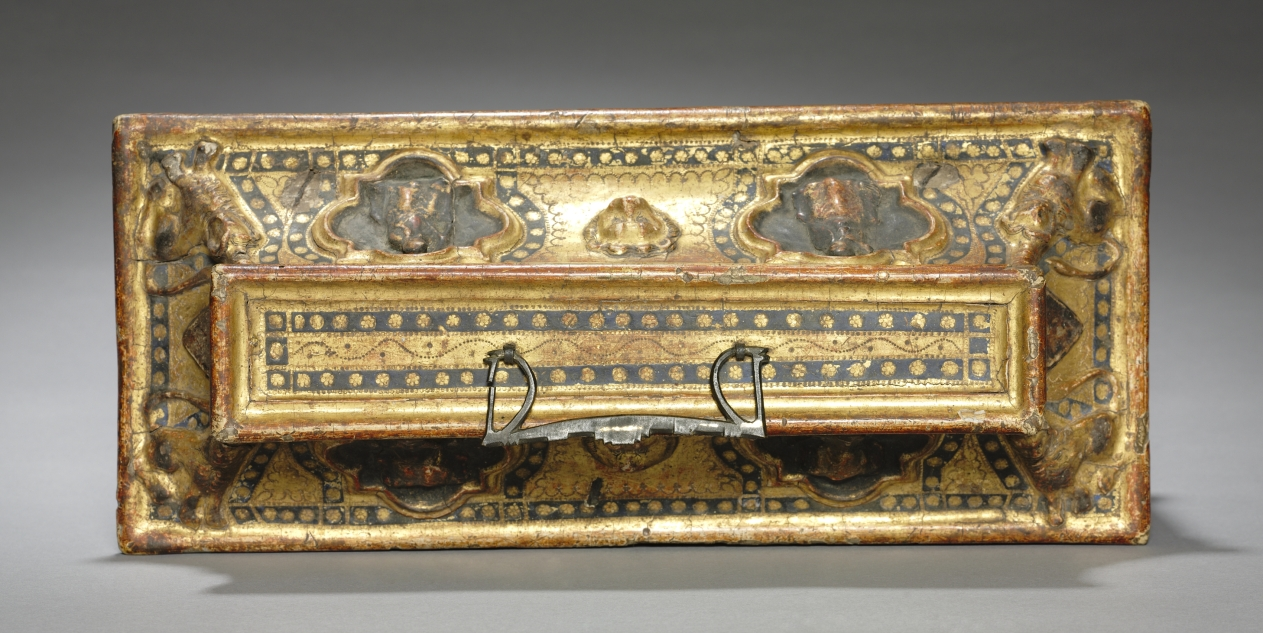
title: Casket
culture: Italy, Siena(?)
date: late 1300s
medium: painted and gilded gesso on wood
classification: Furniture and woodwork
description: This casket is one of only a few of its kind to survive in such a fine state of preservation. A variety of such caskets were used in wealthy homes to store jewelry, seals, mirrors, and combs. A keyhole lock is provided for security. Caskets like this were often highly decorated and given to women as gifts.